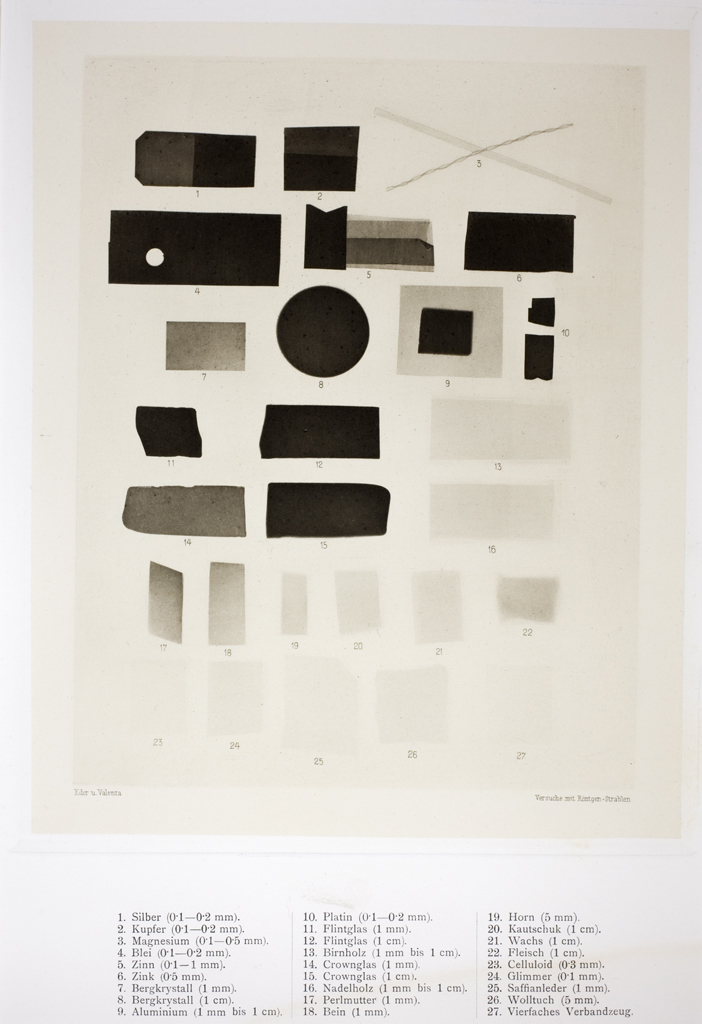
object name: Photograph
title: Table of the Permeability of Various Substances to Roentgen Rays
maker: Josef Maria Eder (Austrian, 1855–1944) and; Eduard Valenta (Austrian, 1857–1937)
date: 1896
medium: Photogravure, plate No. 5 from "Research on Photography with Röntgen Rays (Versuche über Photographie mittelst der Röntgen’schen Strahlen)"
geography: Austria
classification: photograph; photography